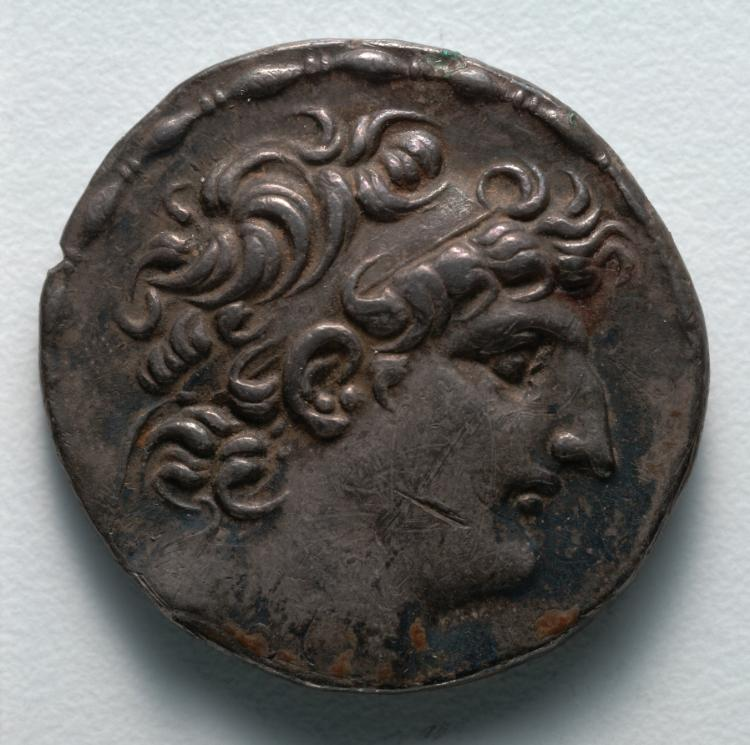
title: Tetradrachm: Head of Antiochos VIII (obverse)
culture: Greek, Seleukid, minted at Antioch (Syria), reign of Antiochos VIII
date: 112–110 BCE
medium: silver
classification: Coins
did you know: The coins of Antiochos VIII are distinguished by his extremely hooked nose and pudgy face.